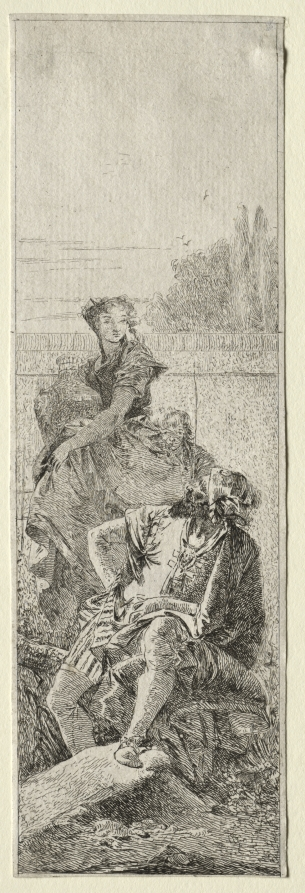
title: Two Peasants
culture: Italy, 18th century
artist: Giovanni Domenico Tiepolo (Italian, 1727–1804)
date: late 1700s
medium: etching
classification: Print